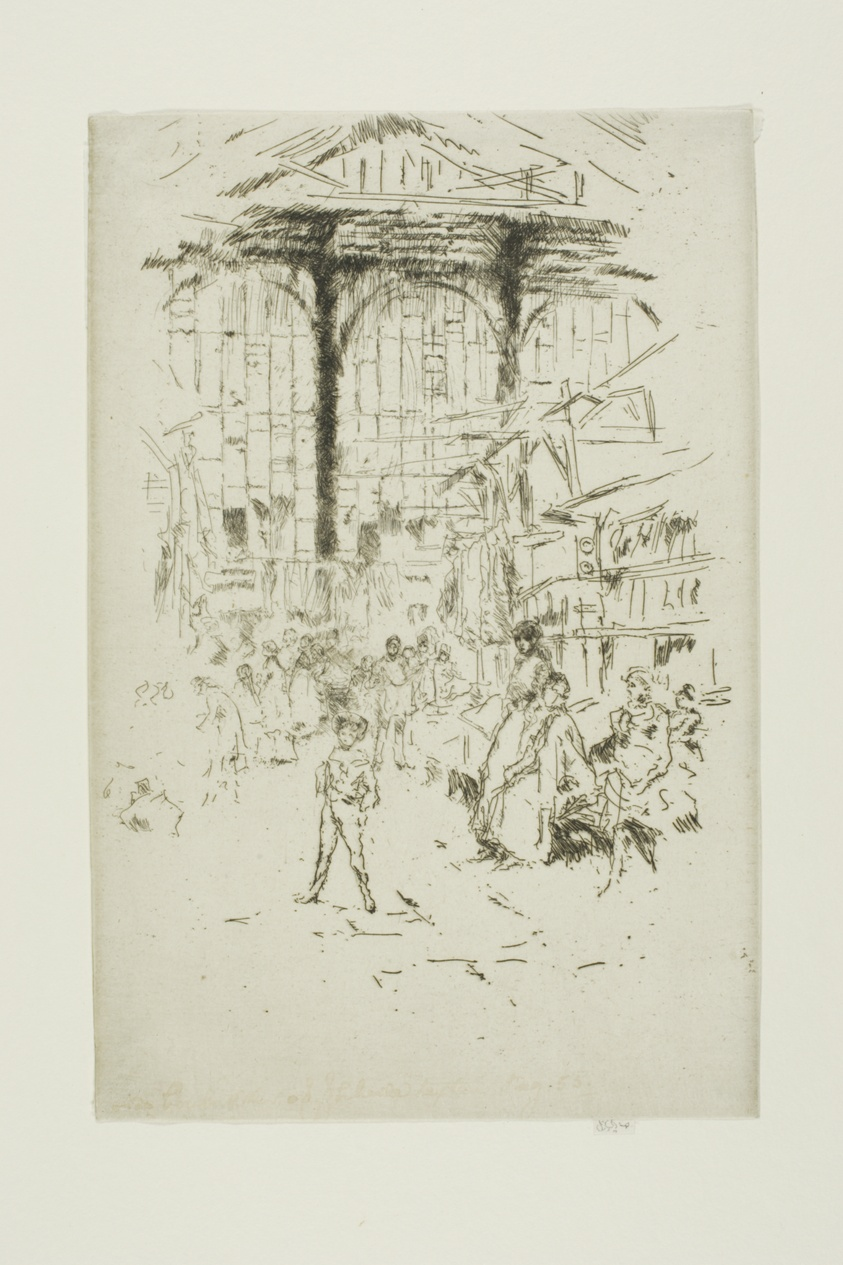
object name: Print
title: Clothes-Exchange, Houndsditch, No. 2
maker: James McNeill Whistler (American, 1834-1903)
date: 1887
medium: Etching and drypoint with foul biting in black ink on ivory laid paper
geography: United States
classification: etching; foul biting; print; prints and drawing; drypoint; paper